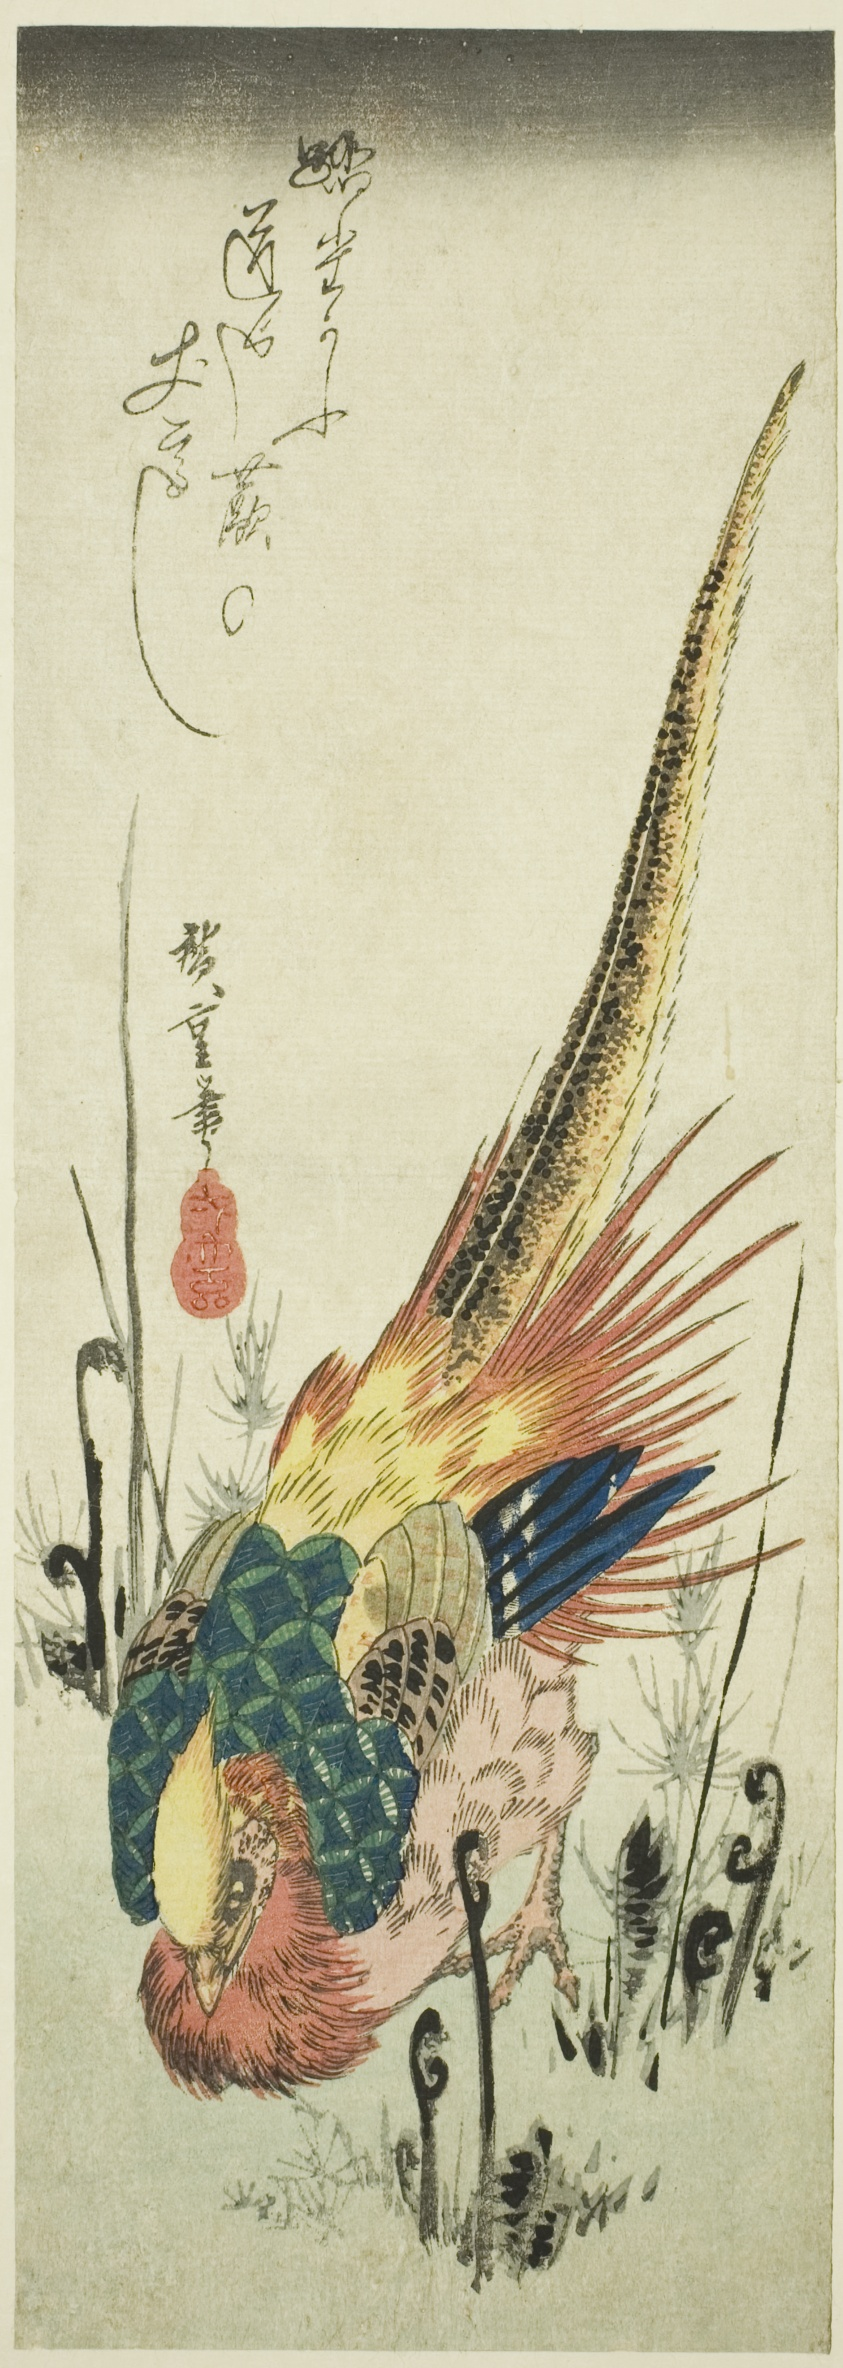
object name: Print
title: Golden pheasant and bracken ferns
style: Japanese (culture or style)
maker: Utagawa Hiroshige 歌川 広重; Japanese, 1797-1858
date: c. 1830s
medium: Color woodblock print; chutanzaku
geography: Japan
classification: woodblock print; print; asian art